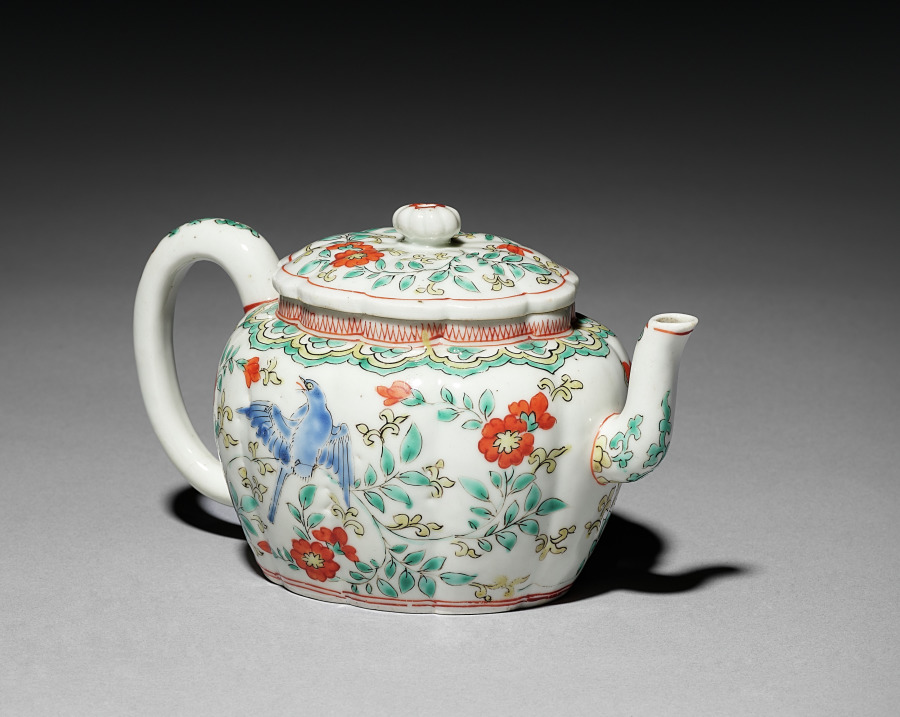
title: Teapot with Birds and Flowers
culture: Japan, Edo period (1615–1868)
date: 1700s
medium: Porcelain with overglaze color enamel (Arita ware)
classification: Ceramic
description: This small vessel was likely made as a teapot for the European export market. The different colored overglaze enamels, orange, blue, green, and yellow, combine with a wiry black outline to form the design of a singing bird on a flowering bough repeated on each side of the pot.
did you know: The wood storage box for this pot refers to it as a suichū, which means water ewer.